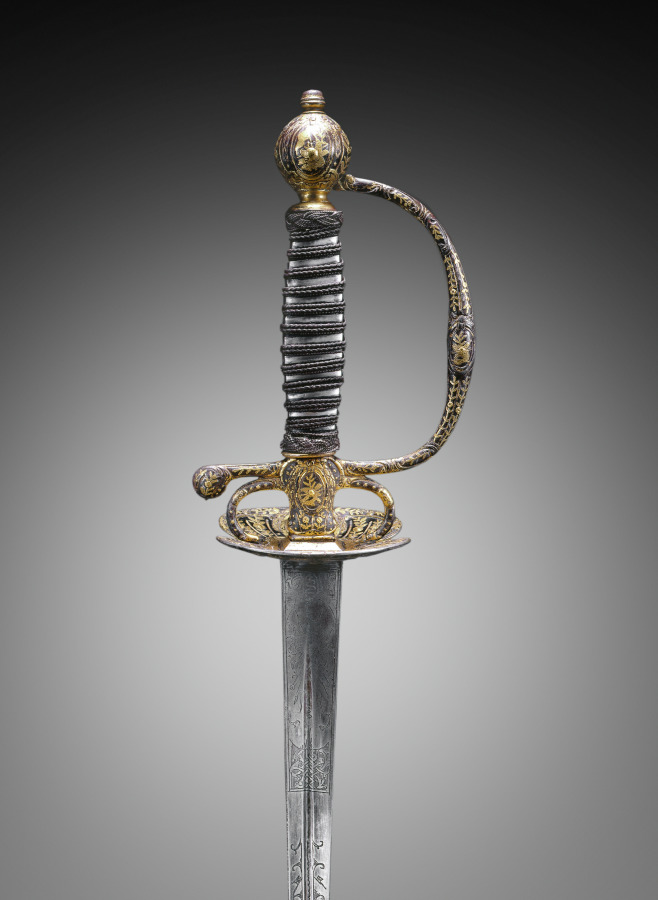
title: Smallsword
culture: France, Paris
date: c. 1730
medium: steel, blued, with gold encrusted decoration; chased and engraved; silver wire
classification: Arms and Armor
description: During the 1700s, the small-sword emerged as a light, quick weapon. Like the rapier it was carried by unarmored civilians, the noblemen of the upper classes. Over time this delicate sword became more an accessory of male attire than a weapon essential to life and death. The sword hilt, which shows even when the blade is sheathed, became the ground for elaborate decoration. These small swords thus represent the final stage in the evolution of the sword, from the edged weapons of antiquity to the elegantly refined blades of the 1700s and 1800s.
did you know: The decorative design of the hilt was often carried down onto the blade, which could be chased or etched with designs, and gilded or blued as seen here.